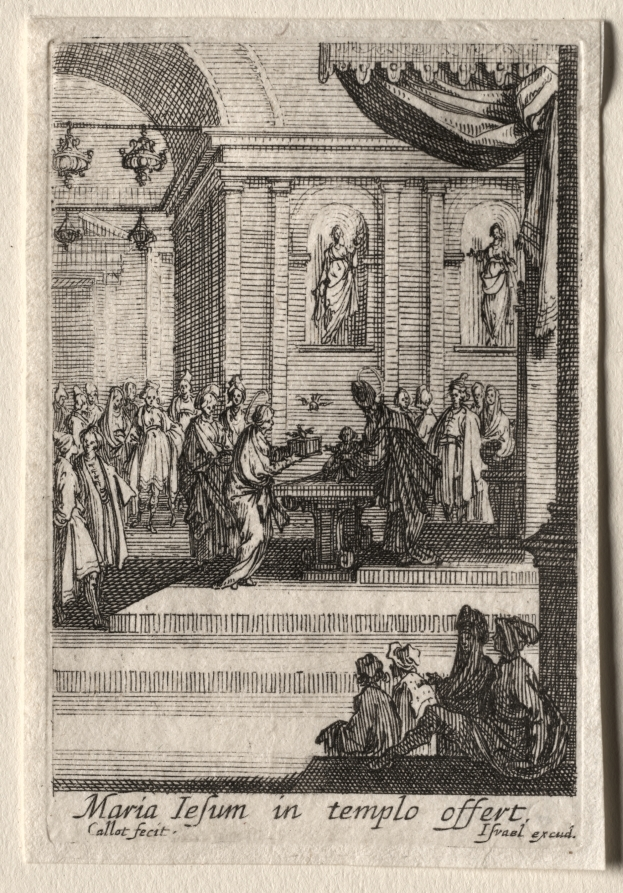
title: The Life of the Virgin: The Presentation of Christ in the Temple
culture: France, 17th century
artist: Jacques Callot (French, 1592–1635)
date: ca. 1633–34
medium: etching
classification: Print